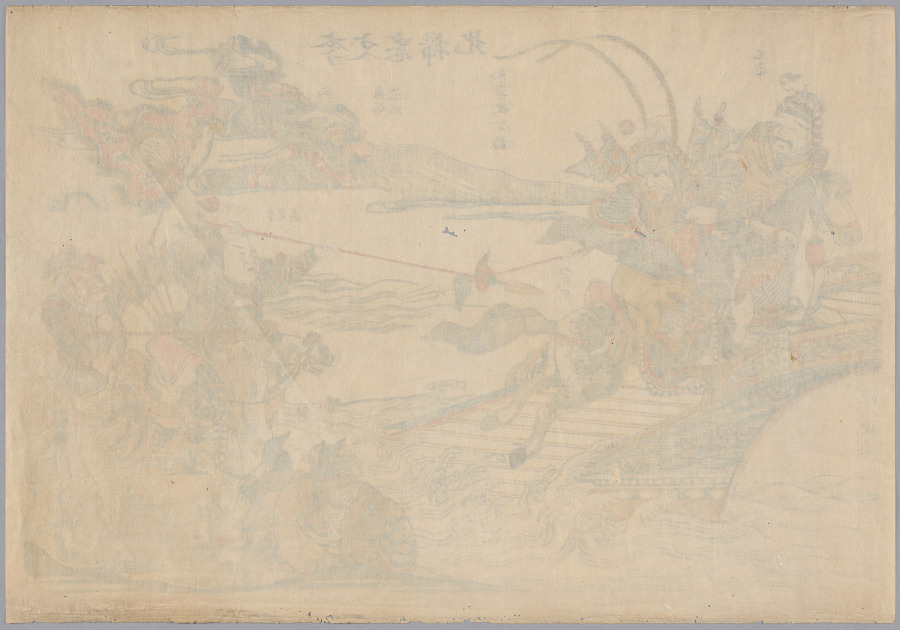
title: Li Wenzhong Clears the North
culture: China, Qing dynasty (1644–1911), Jiaqing period (1796–1820)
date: 1796–1820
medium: Polychrome woodblock print; ink and color on paper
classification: Print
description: In the 1600s, printing flourished in such Jiangnan cities as Nanjing, Suzhou, Hangzhou, and Huizhou, evolving from privately enjoyed illustrated books printed in color to more commercialized single-sheet color prints that were hung on walls and became part of the rich urban visual culture.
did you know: Woodblock printing in color reached a height in China in the 1600s to 1700s. The prints were executed by means of sets of separate blocks, each carved to print a different color.